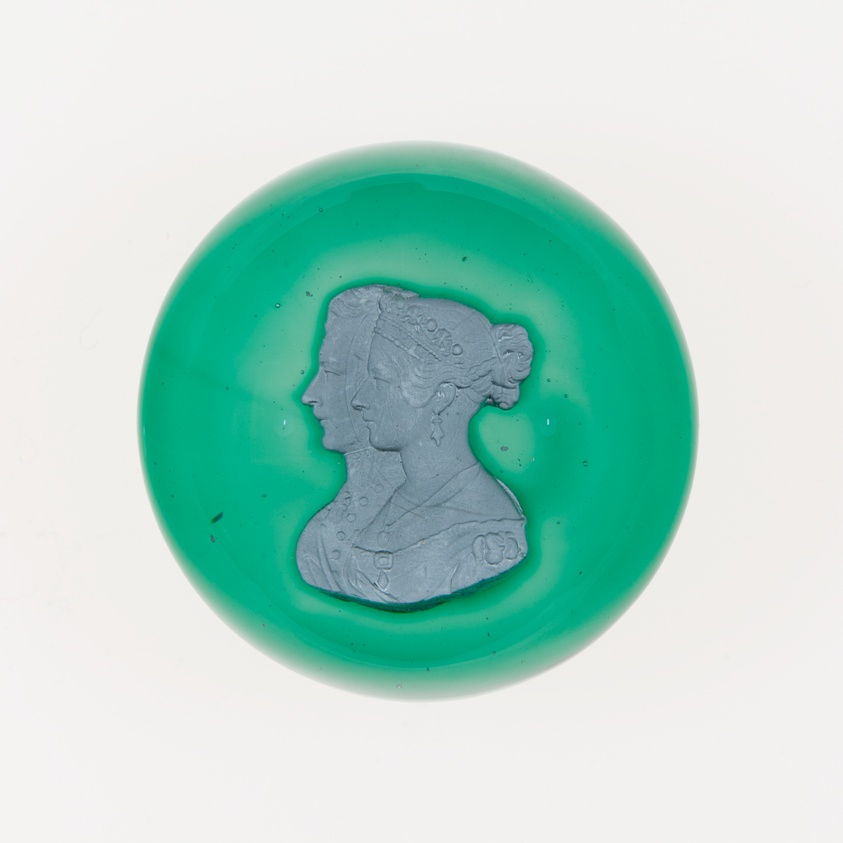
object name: Glass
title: Paperweight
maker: New England Glass Company (Cambridge, Massachusetts, 1818-1888)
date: late 19th century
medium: Glass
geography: Cambridge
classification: paperweight; sulphide (glass); european decorative arts; glass